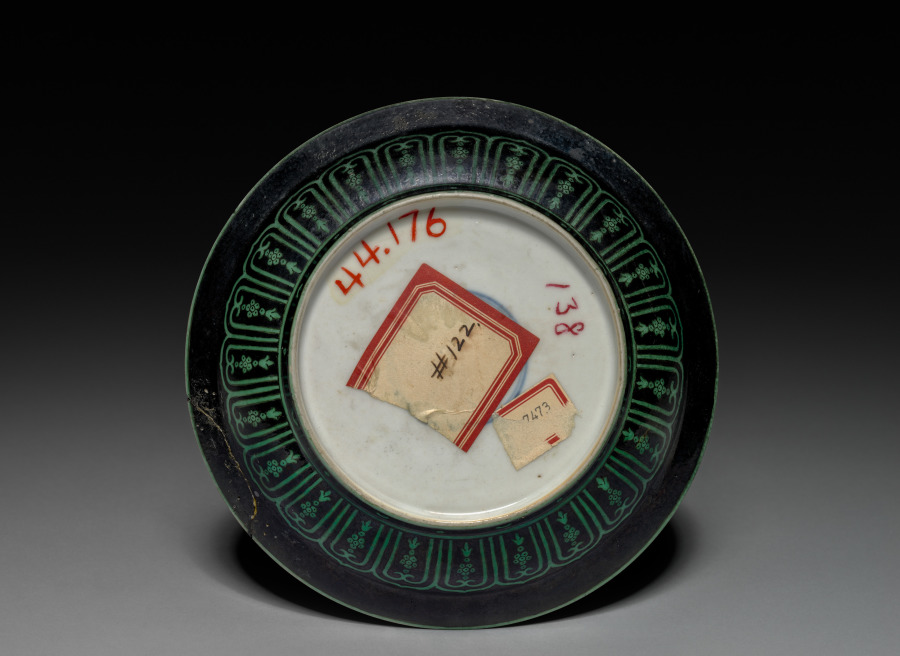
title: Dish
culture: China, Qing dynasty (1644–1911), Qianlong reign (1736–95)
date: 1736–95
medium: porcelain with famille rose overglaze enamel decoration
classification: Ceramic